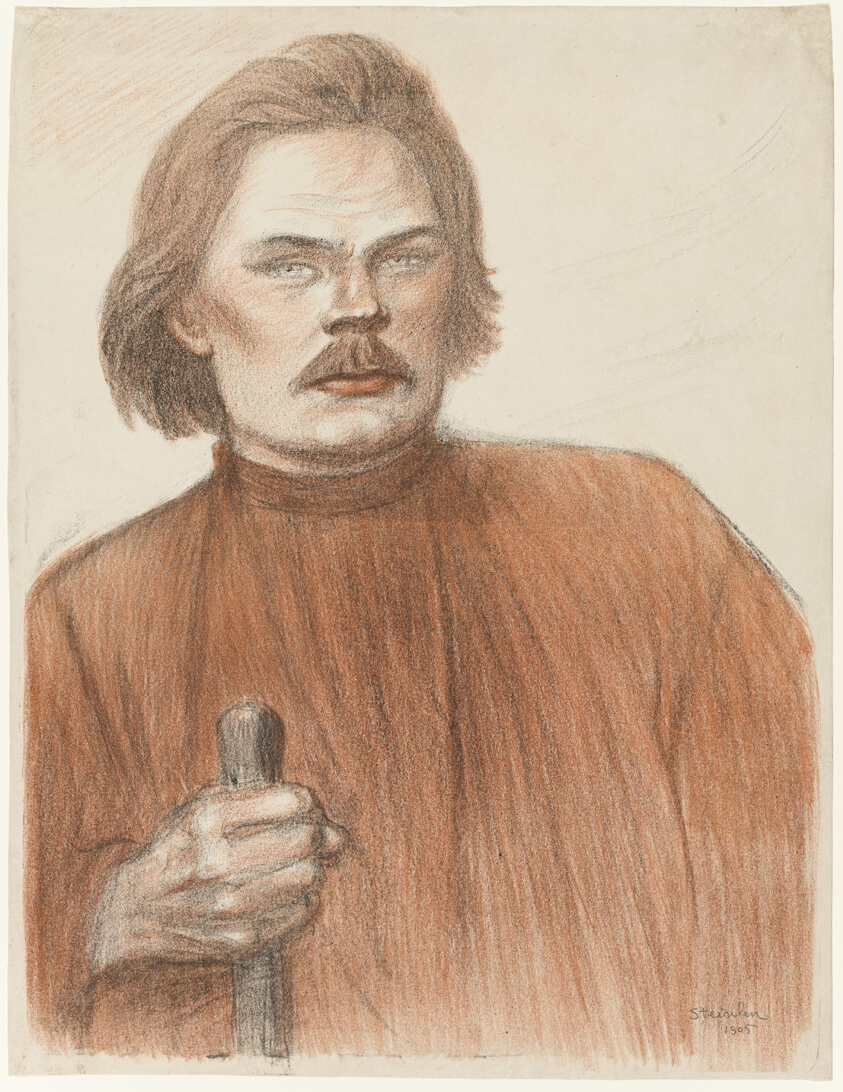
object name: Print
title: Frontal Portrait from the Waist Up of Maxime Gorki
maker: Théophile-Alexandre Steinlen; French, born Switzerland, 1859-1923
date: 1905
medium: Lithograph in red and black on grayish-ivory laid china paper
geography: France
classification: lithograph; print; prints and drawing